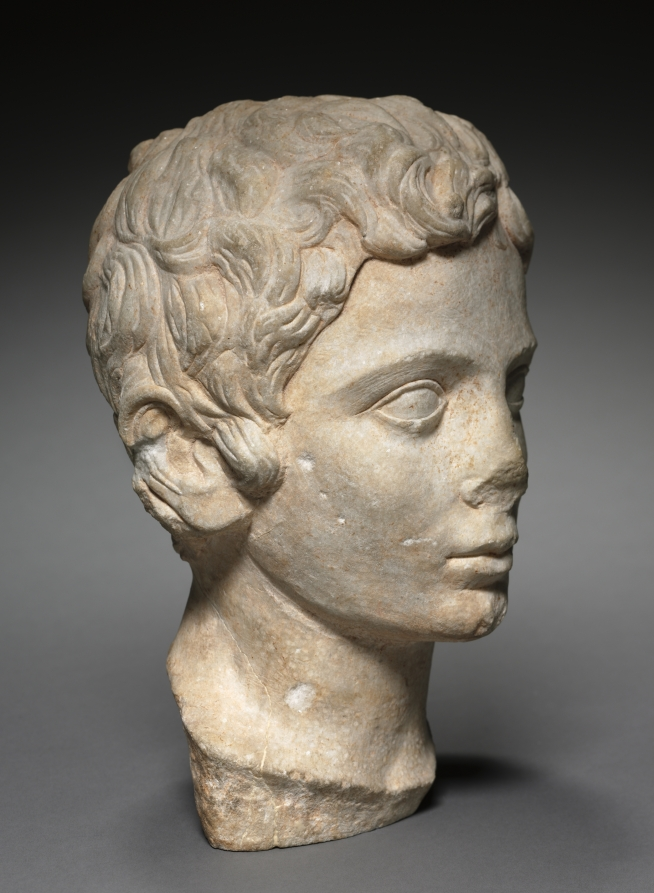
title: Portrait Head of a Youth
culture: Egypt, Alexandria, Roman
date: 1–100 CE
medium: marble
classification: Sculpture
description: Several unusual features of this head suggest that its carving was never finished in antiquity. These include unfinished hair around the ears, small bumps remaining in the hair near the front and top of the head, and the lack of a finely polished surface. Although said to have been found in Egypt, the head is carved of dolomitic marble thought to come from the Saliari region of the northern Greek island of Thasos.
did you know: The carving of this head was never finished.